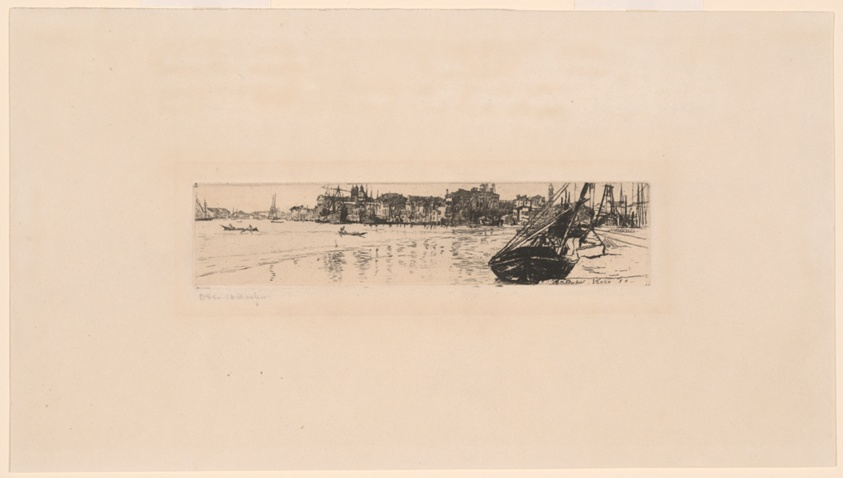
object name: Print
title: Zattere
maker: Otto Henry Bacher (American, 1856-1909)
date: 1880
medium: Etching and drypoint in black on cream wove paper, laid down on cream wove paper (chine collé)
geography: United States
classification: prints and drawing; paper; print; etching